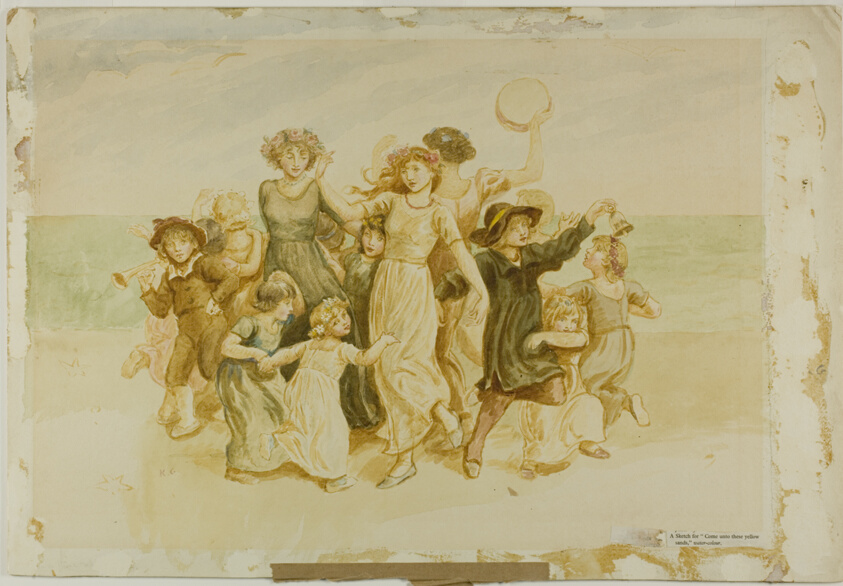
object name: Drawing and Watercolor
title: Children Playing on the Beach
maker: Kate Greenaway (English, 1846-1901)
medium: Watercolor, with touches of white gouache, over traces of graphite, on cream wood-pulp laminate board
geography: England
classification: watercolor; drawings (visual works); prints and drawing